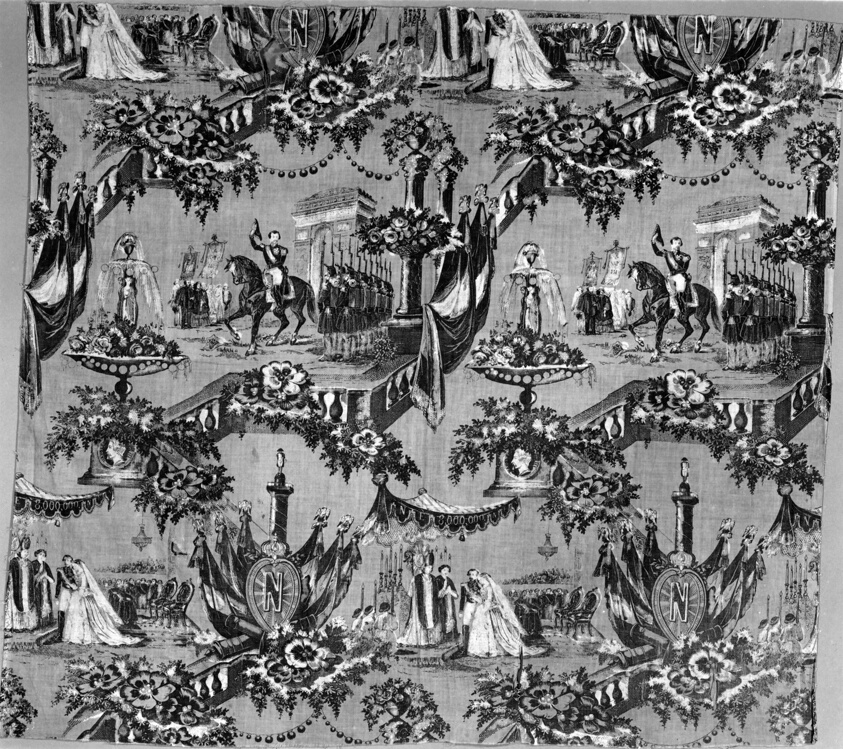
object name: Textile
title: Marriage of Eugenie and Napoleon III (Furnishing Fabric)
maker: France, Alsace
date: c. 1853/55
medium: Cotton, plain weave; engraved roller printed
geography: France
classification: textile; weaving - printed; furnishing textile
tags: propaganda